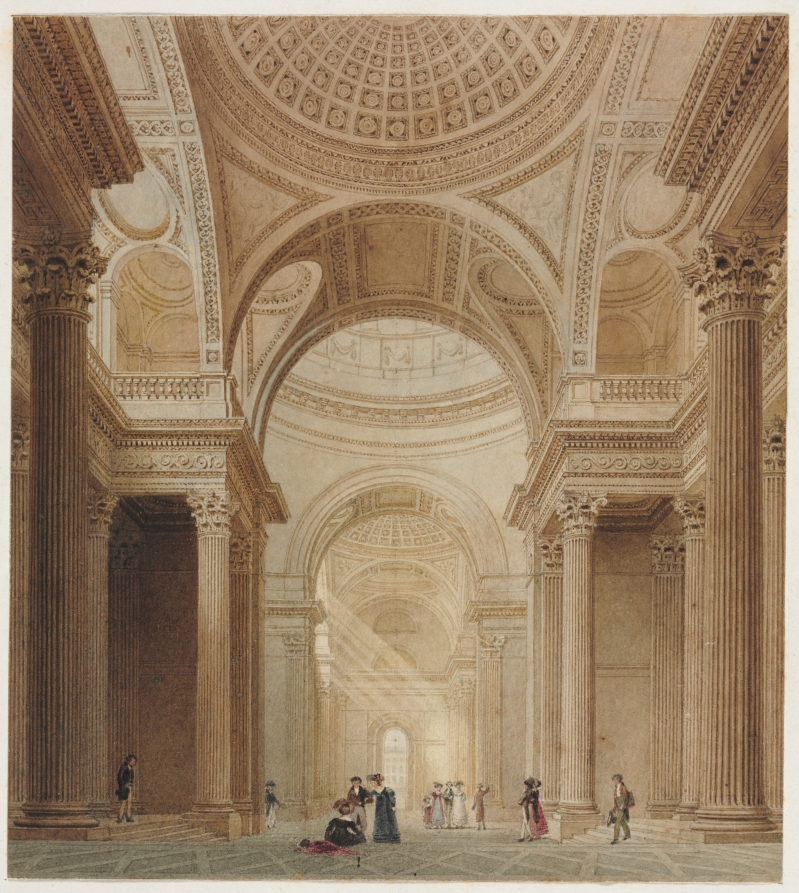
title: Interior of the Pantheon in Paris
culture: England, 19th century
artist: Fredrick Nash (British, 1782–1856)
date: c. 1800–1856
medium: watercolor over graphite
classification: Drawing